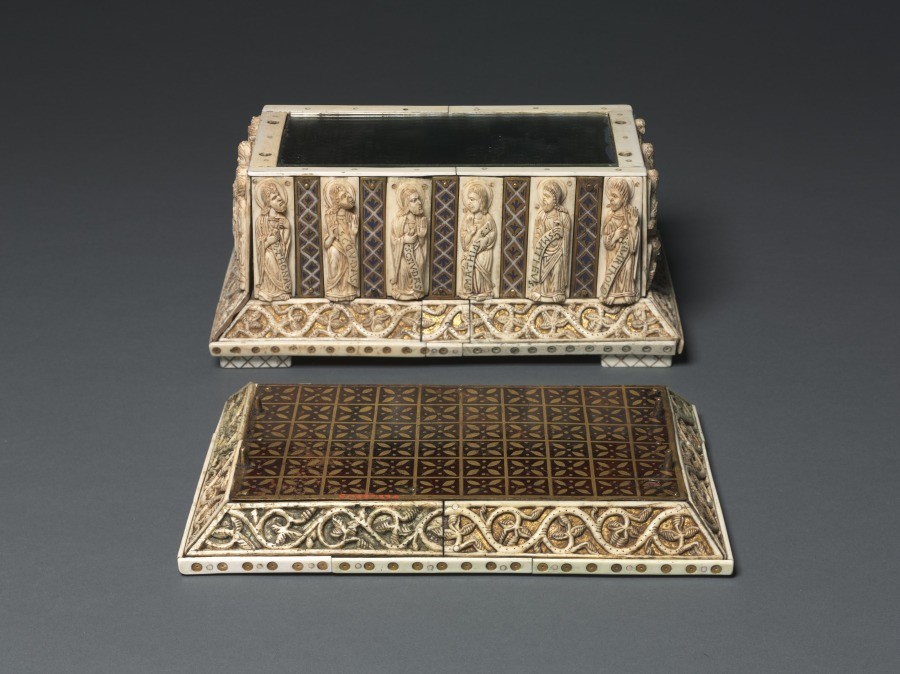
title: Portable Altar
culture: Germany, Cologne, Gothic Period, 13th century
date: c. 1200–1220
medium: walrus ivory, gilded copper, porphyry, champlevé enamel, wood core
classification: Ivory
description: The principal decoration of this portable altar is carved of walrus ivory. On the long sides are traditional figures of standing apostles. On the short sides are the seated Virgin with the Magi, and Christ the Judge between the symbols of the Evangelists. The commercial ties between the Rhineland and the Norse peninsula made walrus ivory easily available to the city of Cologne, one of the most important artistic centers in medieval Germany.